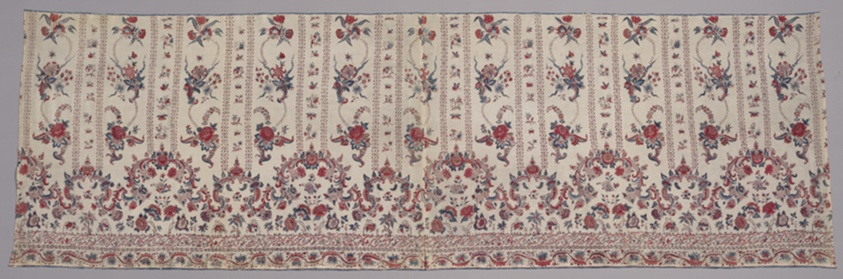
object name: Textile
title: Panel of Chintz for a Woman's Skirt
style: 18th Century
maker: Made in India possibly for the Dutch or Latin American market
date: 1730-50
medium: Cotton, plain weave; hand painted and dyed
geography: India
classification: textile; weaving - printed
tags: paisley, hunter, animals, floral, floral motifs, floral patterns, flowers, scrolls (motifs)